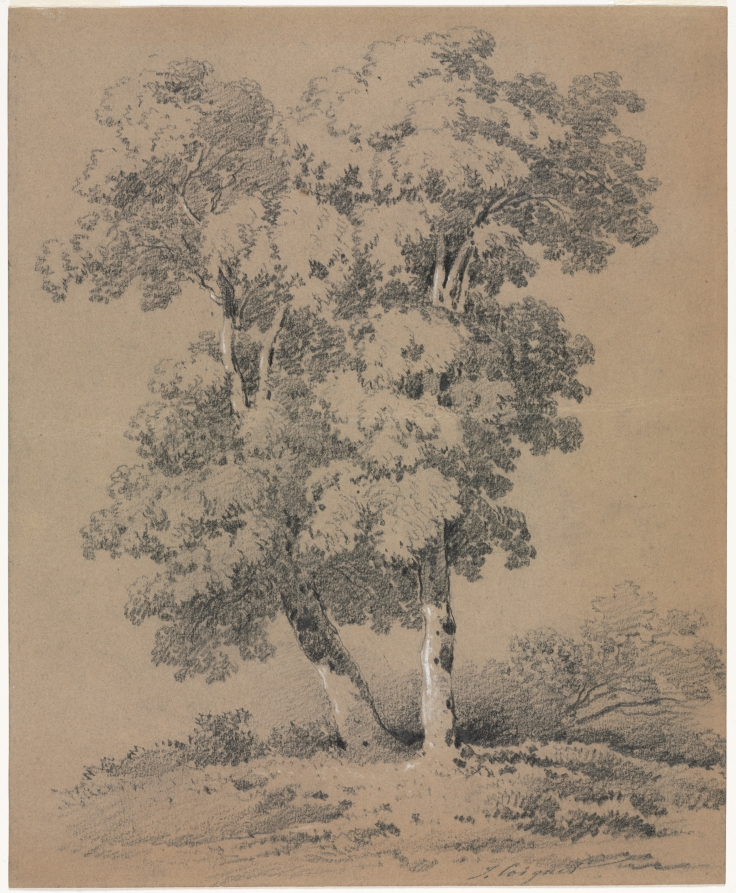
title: Tree Study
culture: France, 19th century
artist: Jules Coignet (French, 1798–1860)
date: 19th century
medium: graphite with white heightening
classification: Drawing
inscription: signed in pencil, lower right, "J. Coignet"